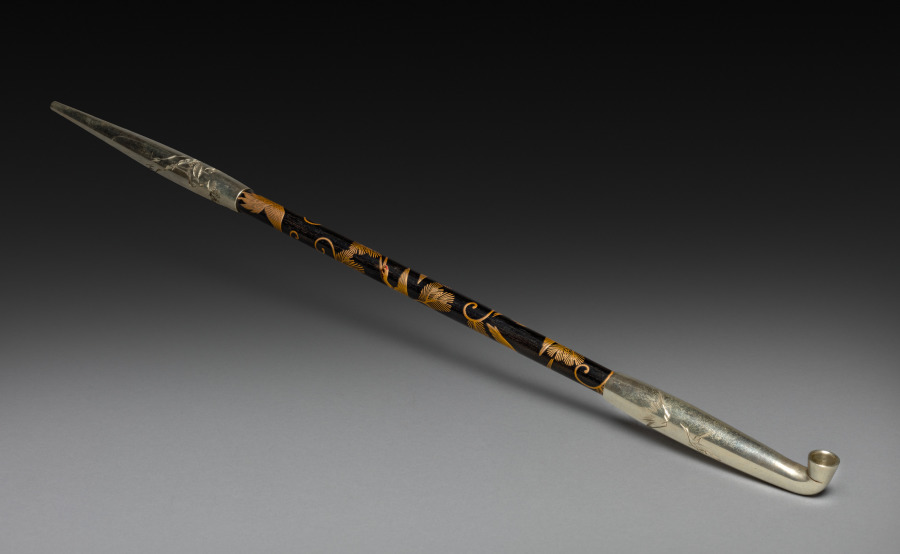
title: Tobacco Pipe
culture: Japan, Edo period (1615–1868)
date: early to mid-1800s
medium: wood and metal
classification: Miscellaneous